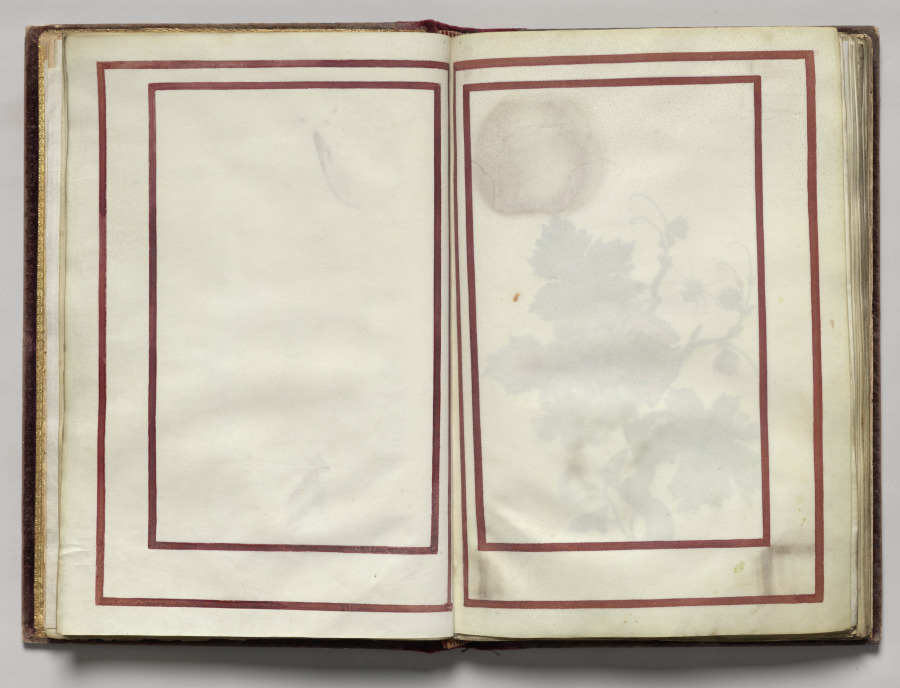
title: Border, folio 10 (recto), from Florilegium (A Book of Flower Studies)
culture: France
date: 1608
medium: watercolor, ink, silver and gold over occasional traces of pencil, on vellum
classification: Bound Volume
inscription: Dated: Poitiers 1608 (on frontispiece) Signed: On frontispiece in black ink, lower right: Van Kuyk Notation on drawing: Frontispiece: in pencil, lower margin: * élève de Van Kessel, peintre flammand (* in pencil also appears in front of Van Kuyk's name).